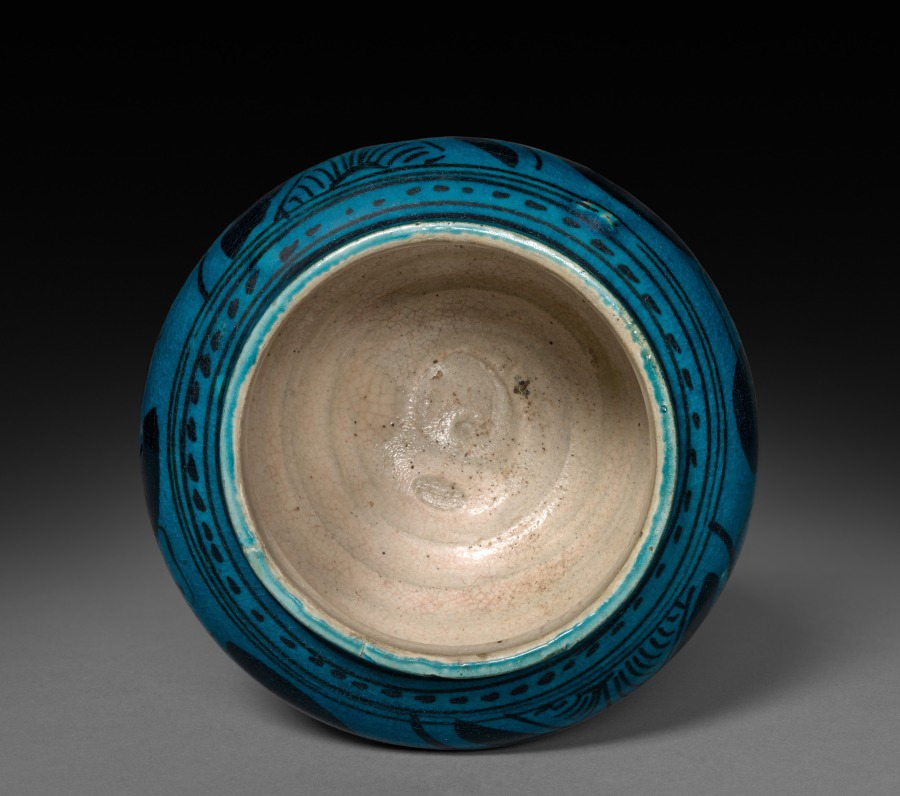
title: Jar: Cizhou ware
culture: China, Yuan dynasty (1271-1368)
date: 1271–1368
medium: stoneware with slip coating, turquoise glaze and painted underglaze decoration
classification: Ceramic